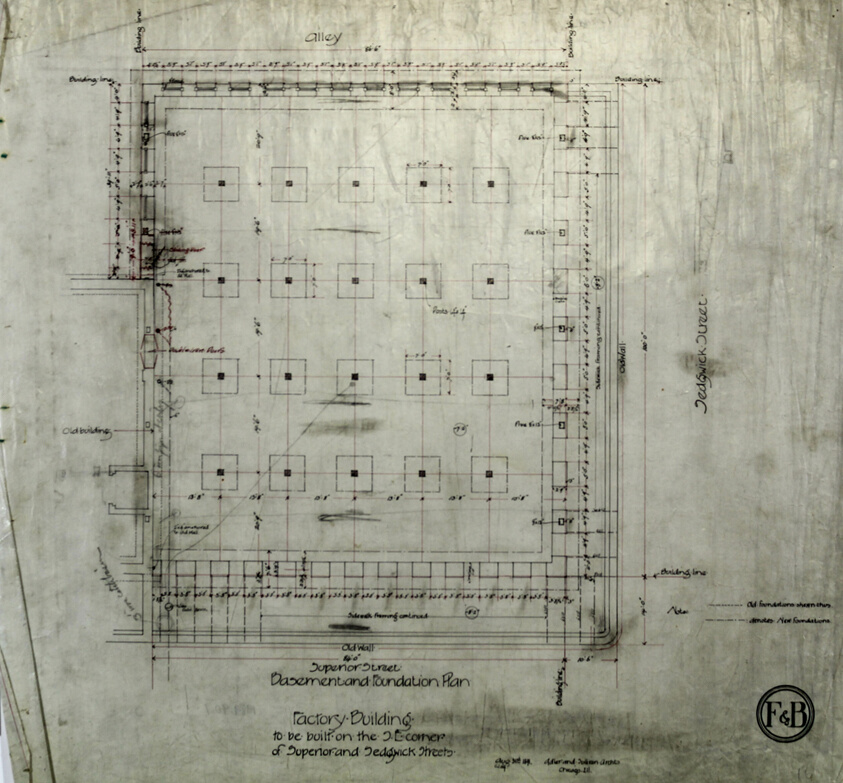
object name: Architectural Drawing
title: Brunswick Balke Collender Company Factory Building, Chicago, Illinois, Foundation Plan and Basement Plan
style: 19th century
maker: Adler & Sullivan, Architects; American, 1883-1895; Delineator: Curth, William F.; American, 19th cen.; Delineator: Gill, Irving J.; American, 1870-1936; Delineator: Self, Charles J.; American, 19th Cen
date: 1891 Destroyed by fire on April 15, 1989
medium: Black and red ink on linen with pencil notes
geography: United States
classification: architectural drawing; architectural working drawing; architecture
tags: Chicago, office buildings, buildings, architecture, design, illinois